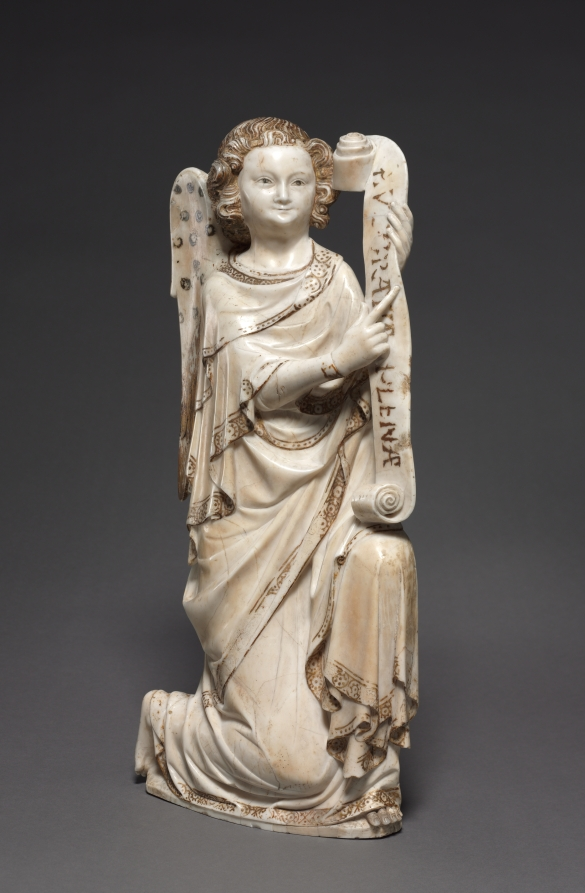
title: The Archangel Gabriel from an Annunciation Group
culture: France, Champagne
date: c. 1350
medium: alabaster with traces of paint and gilding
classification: Sculpture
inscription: Ave Maria, Gratia Plena.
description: In France, the use of alabaster began in the late 1200s for funerary monuments. The Archangel Gabriel, together with its counterpart, the Virgin Mary (now in the Louvre Museum, Paris) is part of an Annunciation. This is a rare example of alabaster sculpture from the 1300s. The alabaster comes from a quarry near Malaucène in Provence (France), making it an instance of long-distance trade of the rare material. Although the figure is very flat, it was likely made to also be viewed from the back, where there are remnants of gilding and the peacock feathers of the angel’s wing.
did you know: The surface of alabaster works can vary. By differentiating the intensity of polishing, it is possible for sculptures to create a surface with varying degrees of luster, or shine.